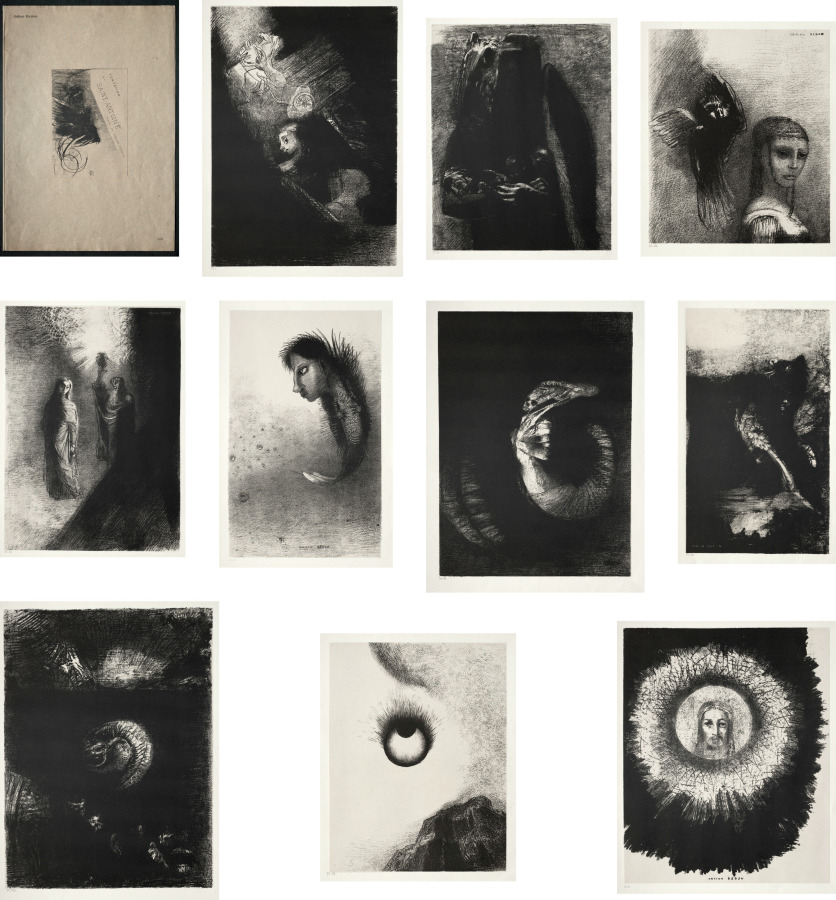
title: The Temptation of Saint Anthony (First Series)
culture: France, 19th century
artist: Odilon Redon (French, 1840–1916)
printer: Becquet (French)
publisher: Edmond Deman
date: 1888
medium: ten lithographs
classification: Print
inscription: initialed at bottom center of image: OR; printed at upper left: ODILON REDON; diagonally at right of image: TENTATION / DE / SAINT-ANTOINE / TEXTE DE GUSTAVE FLAUBERT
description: This portfolio is one of three made by Odilon Redon inspired by avant-garde writer Gustave Flaubert’s novel The Temptation of Saint Anthony (1874). Captivated by the book’s fantastical account of moralizing tests encountered by a hermit in the desert, Redon executed charcoal drawings and attempted to evoke that medium’s dense blackness in his lithographs. Based on the text’s darkly imaginative tone rather than its actual content, the works in this series present invented monsters and figures in otherworldly settings with jarring tonal variations. Although Redon felt that the prints effectively translated the surreal universe of his source material, they were largely misunderstood in his own time.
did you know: Publisher Edmond Deman commissioned this portfolio after he saw an 1886 exhibition of Redon's work in Brussels, Belgium.